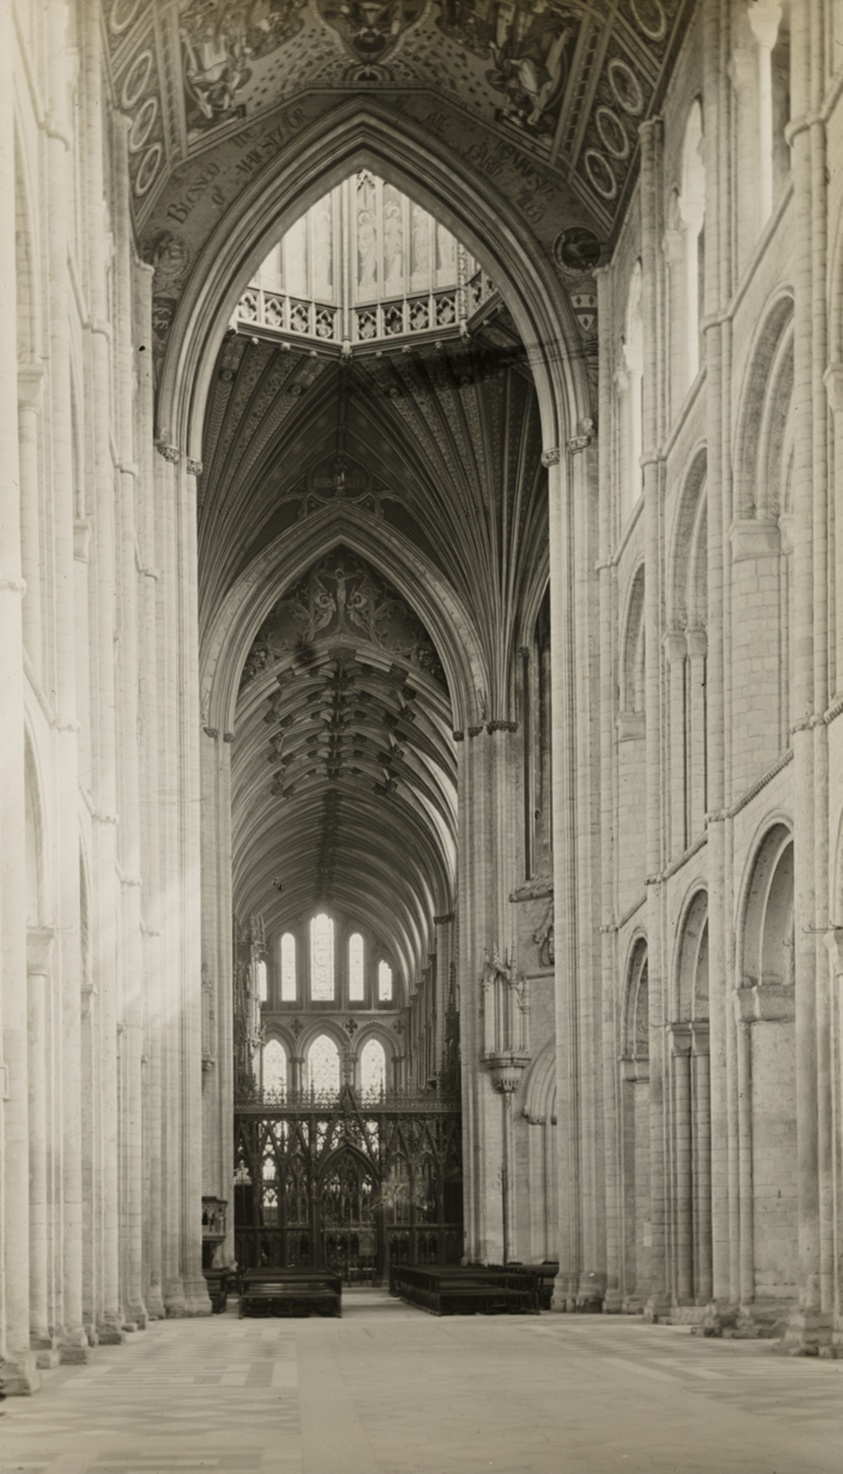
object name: Photograph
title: Ely Cathedral: Nave to East, from Octagon Arch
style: Pictorialism, 19th century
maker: Frederick H. Evans (English, 1853–1943)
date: 1891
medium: Lantern slide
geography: England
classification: photograph; photography